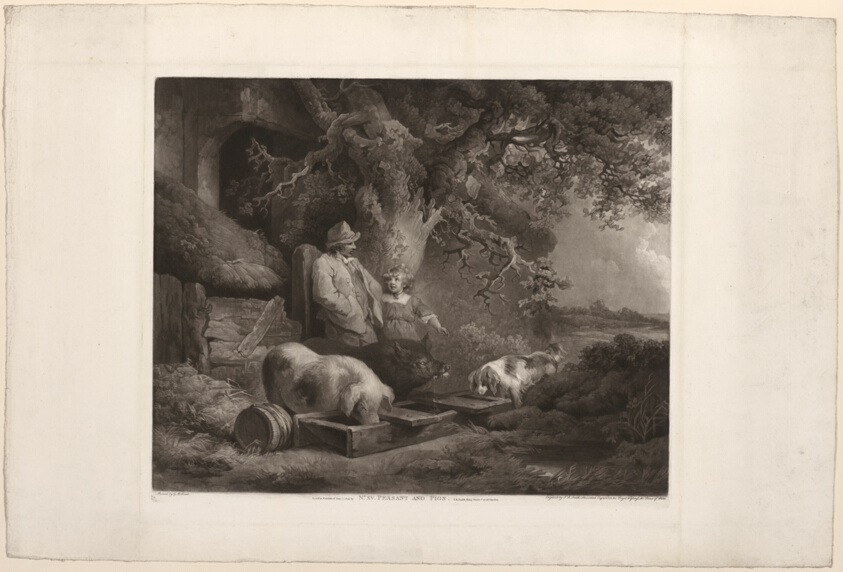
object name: Print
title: Peasant and Pigs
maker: John Raphael Smith (English, 1752-1812); after George Morland (English, 1763-1804)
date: 1803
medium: Mezzotint on off-white wove paper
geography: England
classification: mezzotint; print; prints and drawing